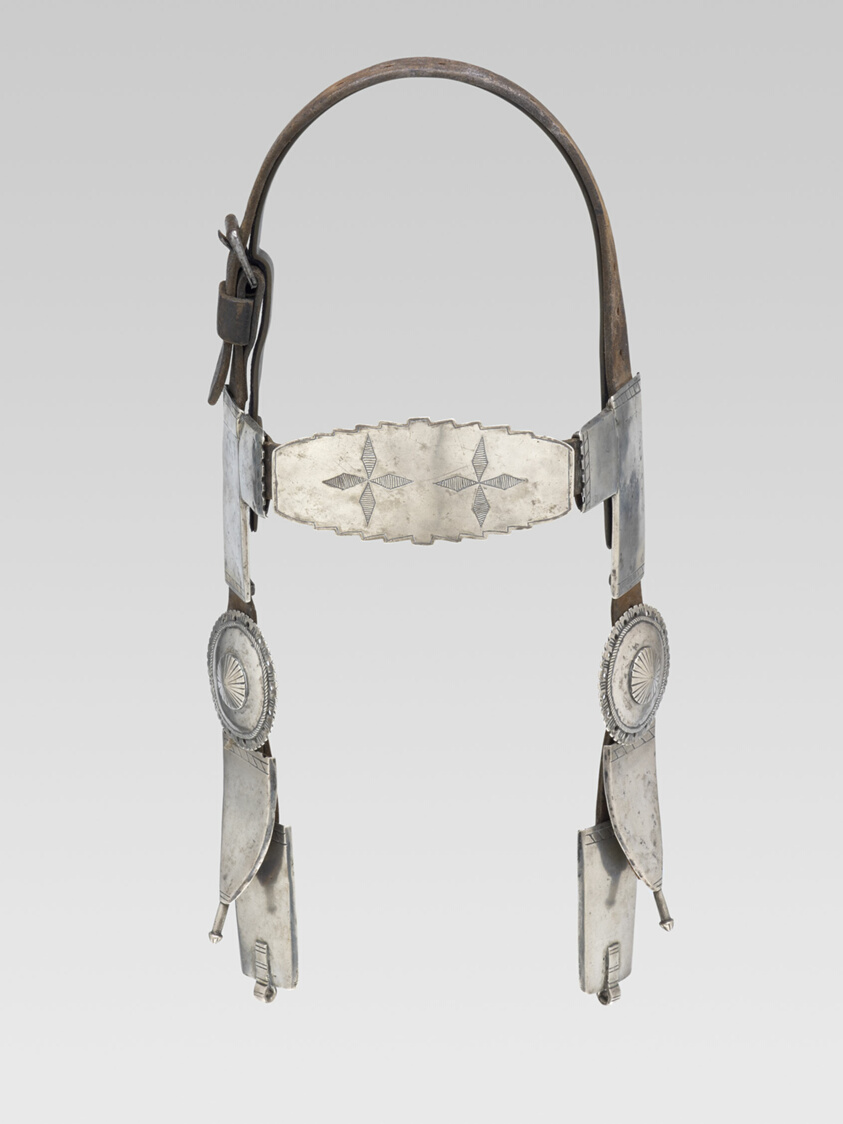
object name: Costume and Accessories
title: Horse Headstall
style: navajo, dine, americas, native american, native north american, Arts of the Americas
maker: Navajo (Diné) (Northern New Mexico or Arizona, United States)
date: 1870s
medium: Silver and leather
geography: New Mexico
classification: headpiece (animal equipment); american decorative arts; art of the americas; silver; decorative arts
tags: horse, ornaments, silver (color)